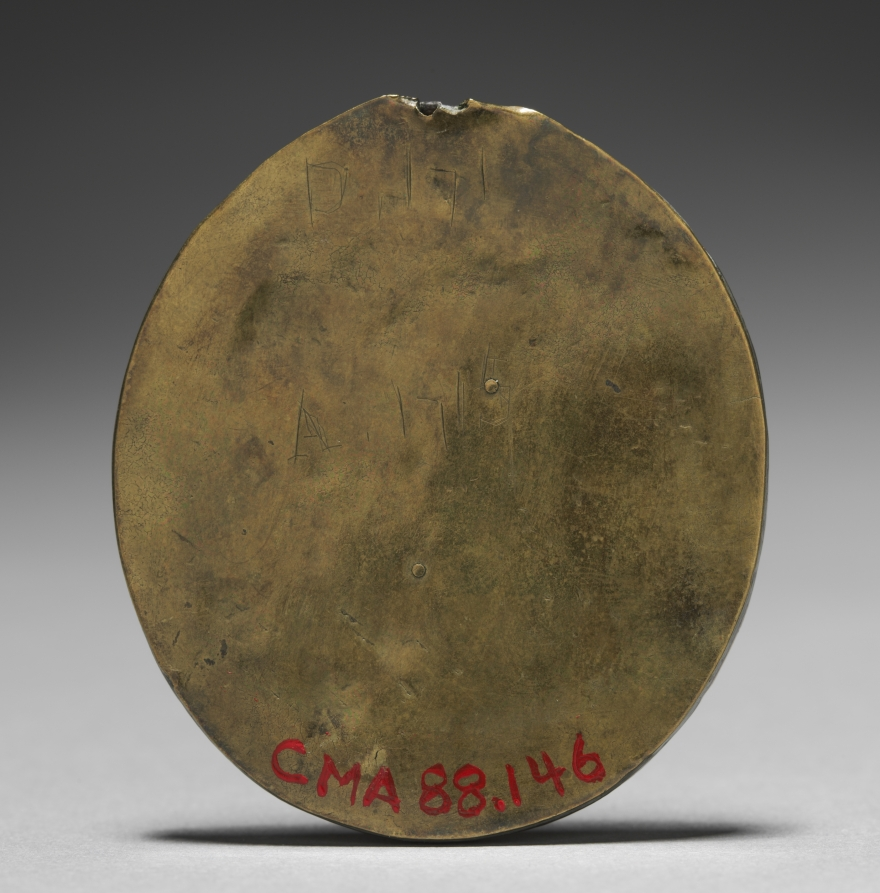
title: Portrait of Archduke Charles of Styria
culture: Austria or South Germany, 16th century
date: c. 1564–70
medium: silver, gilt silver, and gilt copper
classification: Sculpture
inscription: raised sword inscribed with: AVDASES ° FORTVNA ° IVVAT (Fortune assists the brave), the personal motto of Archduke Charles of Syria.